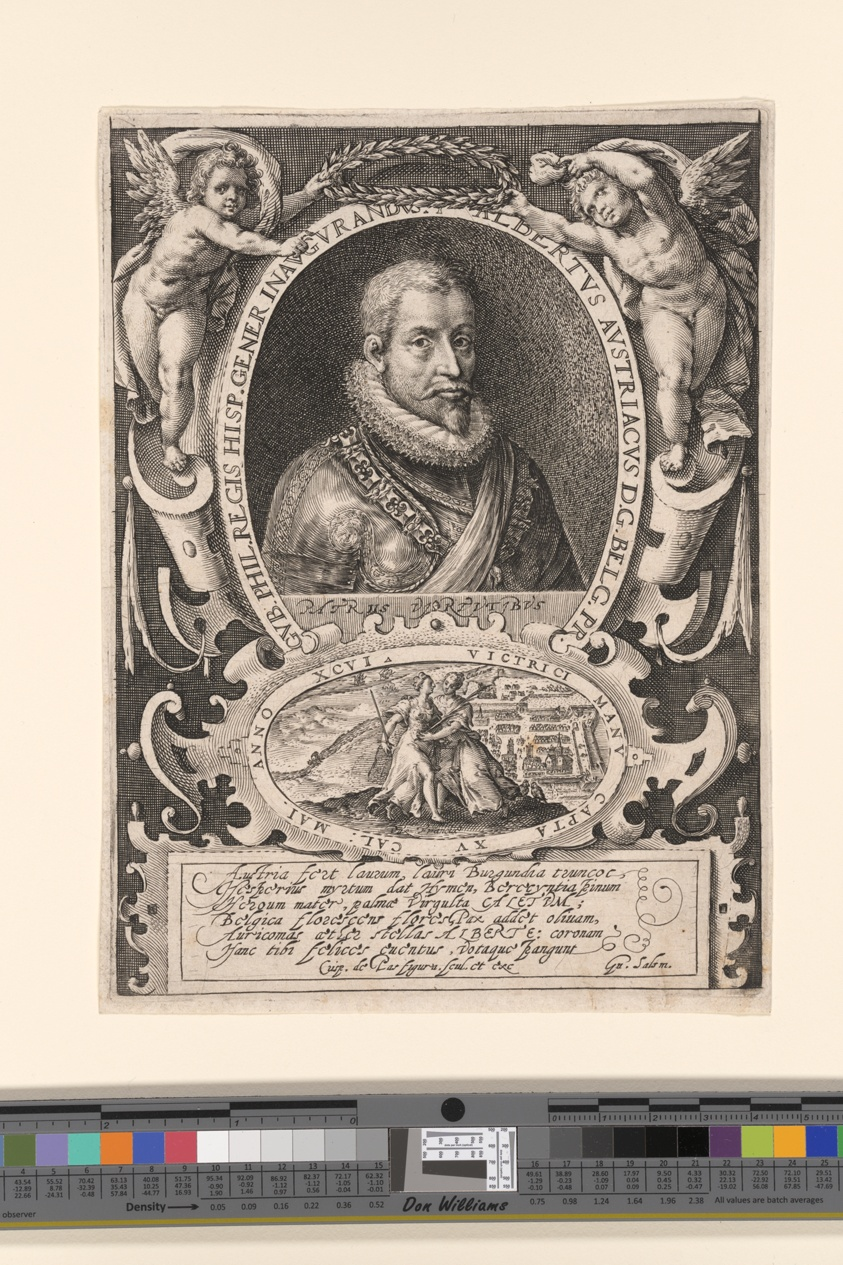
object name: Print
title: Archduke Albert of Austria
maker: Crispijn van de Passe I; Dutch, c. 1565–1637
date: c. 1596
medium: Engraving on paper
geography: Netherlands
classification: engraving; paper; print; prints and drawing